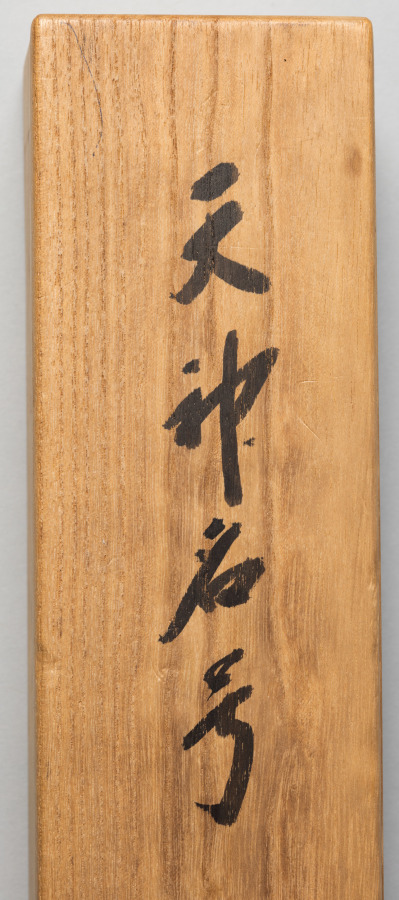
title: Sacred Name of Tenjin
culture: Japan, Muromachi period (1392–1573)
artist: Sakugen Shūryō (Japanese, 1501–1579)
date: 1500s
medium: hanging scroll; ink on paper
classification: Calligraphy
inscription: signed: signature unread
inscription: Sealed: Sakugen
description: The story emerged in the early 1300s that the kami Tenjin had traveled to China and achieved enlightenment under a famous Buddhist meditation master. Paintings of the subject as well as written invocations of Tenjin’s name were highly valued by the monks of Japan’s Zen Buddhist communities, to which an invocation of Tenjin’s name brushed by Zen monk Sakugen Shūryō attests. Sakugen was both a poet and an official envoy to Ming China in the 1500s. Creating calligraphies of deities’ names was akin to painting religious icons.